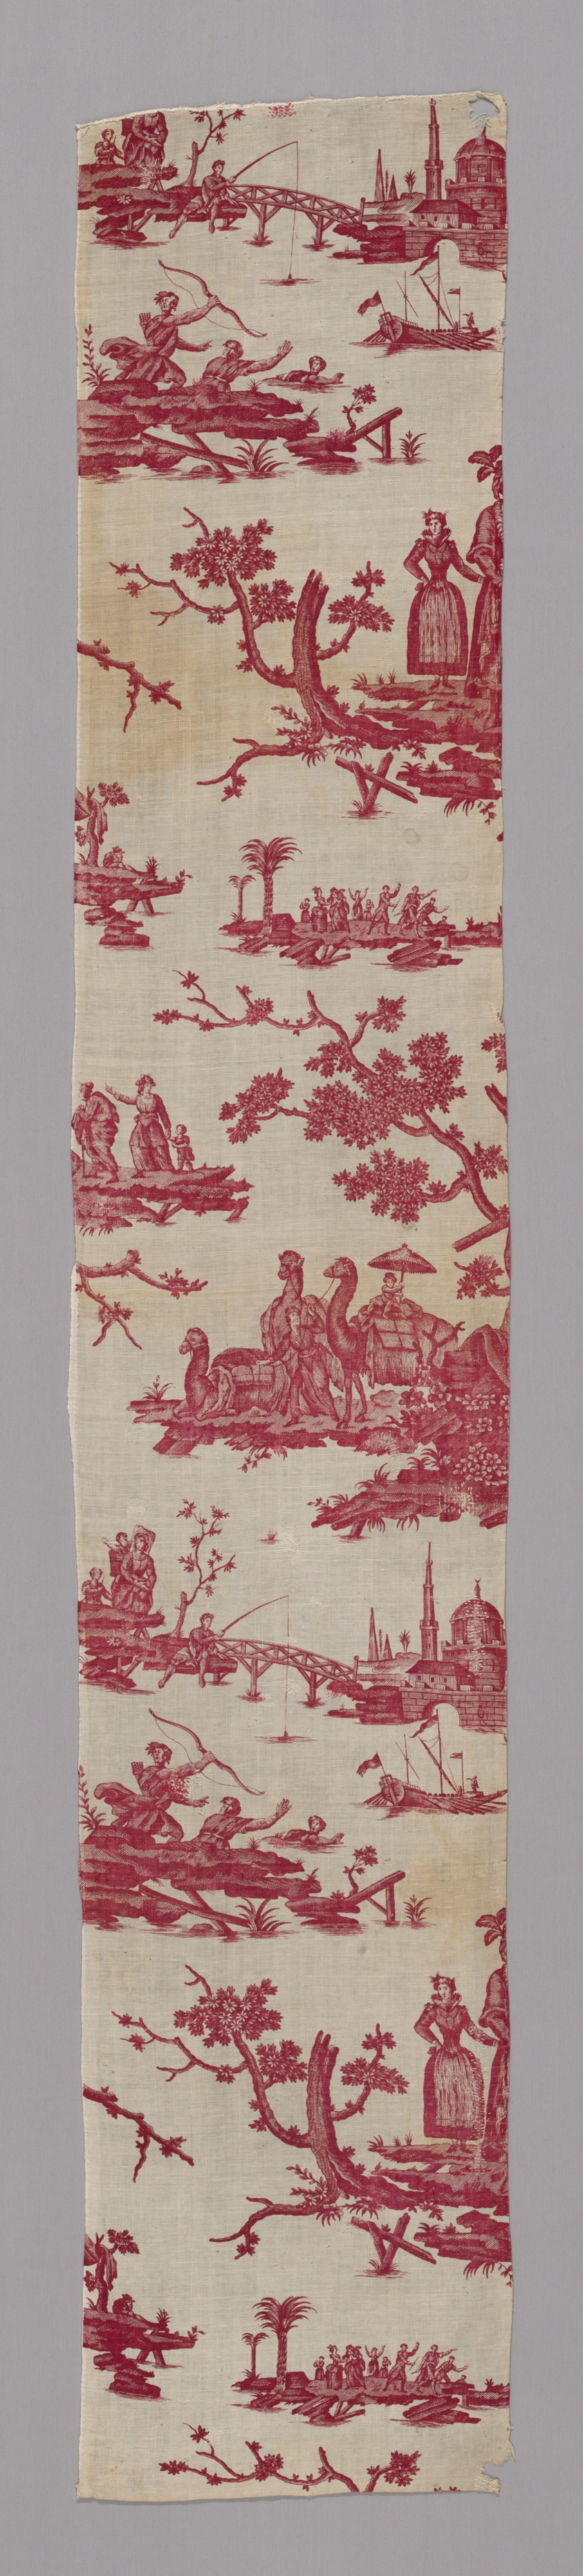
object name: Textile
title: La Caravane du Caire (The Caravan from Cairo) (Furnishing Fabric)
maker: Manufactured by Petitpierre et Cie. (French c. 1760-1791); France, Nantes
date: 1785/89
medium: Cotton, plain weave; copperplate printed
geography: France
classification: textile; weaving - printed; furnishing textile